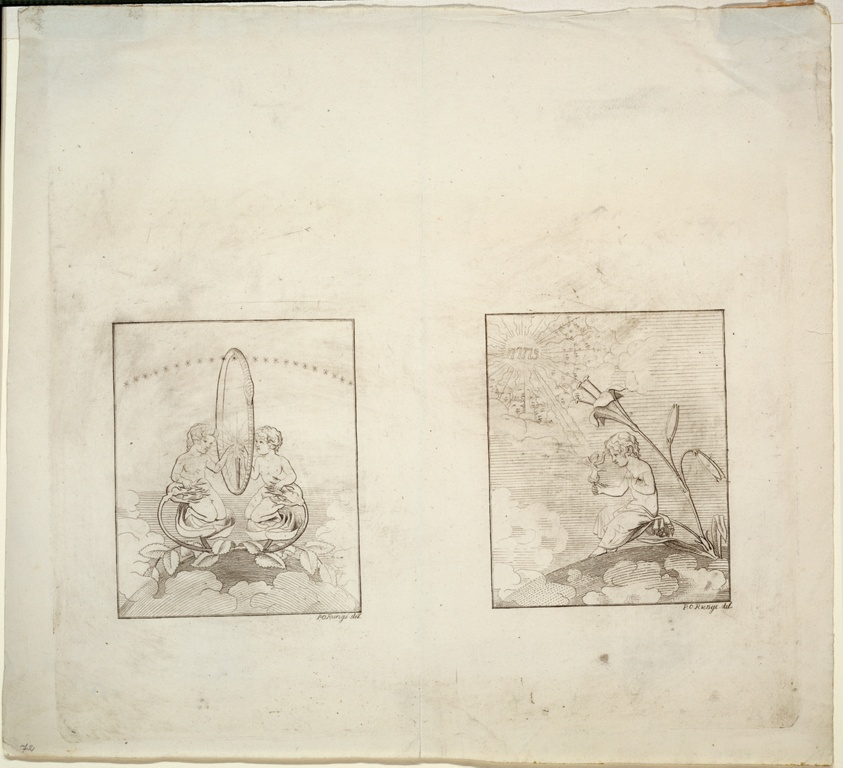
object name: Print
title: Child with Rosebud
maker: Phillip Otto Runge (German, 1777-1810)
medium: Etching on ivory wove paper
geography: Germany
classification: etching; print; prints and drawing